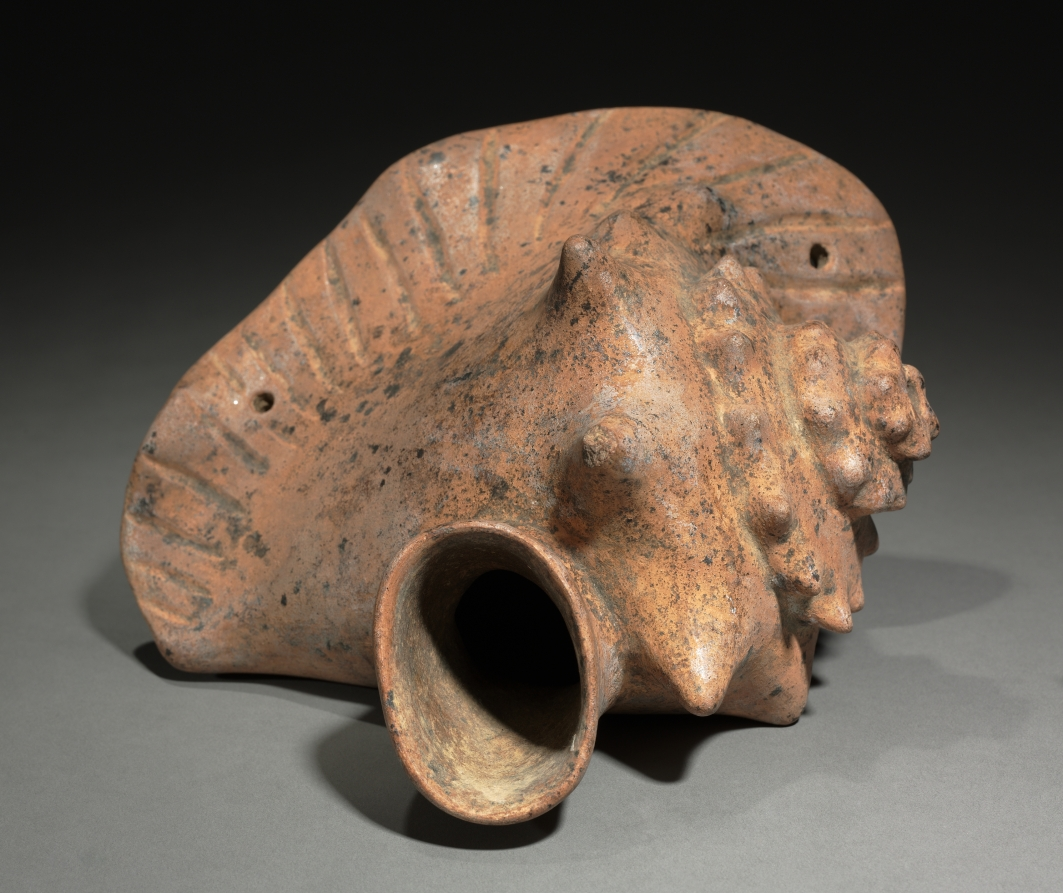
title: Conch Shell Trumpet Vessel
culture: West Mexico, Colima, Comala style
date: 200 BCE–300 CE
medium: earthenware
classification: Ceramic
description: Conch shell trumpets were used during many kinds of important events throughout the ancient Americas. The shells were converted to trumpets by removing the tip to form a mouthpiece, as this ancient ceramic replica of a trumpet shows. Holes were often drilled in the shell for a carrying cord.